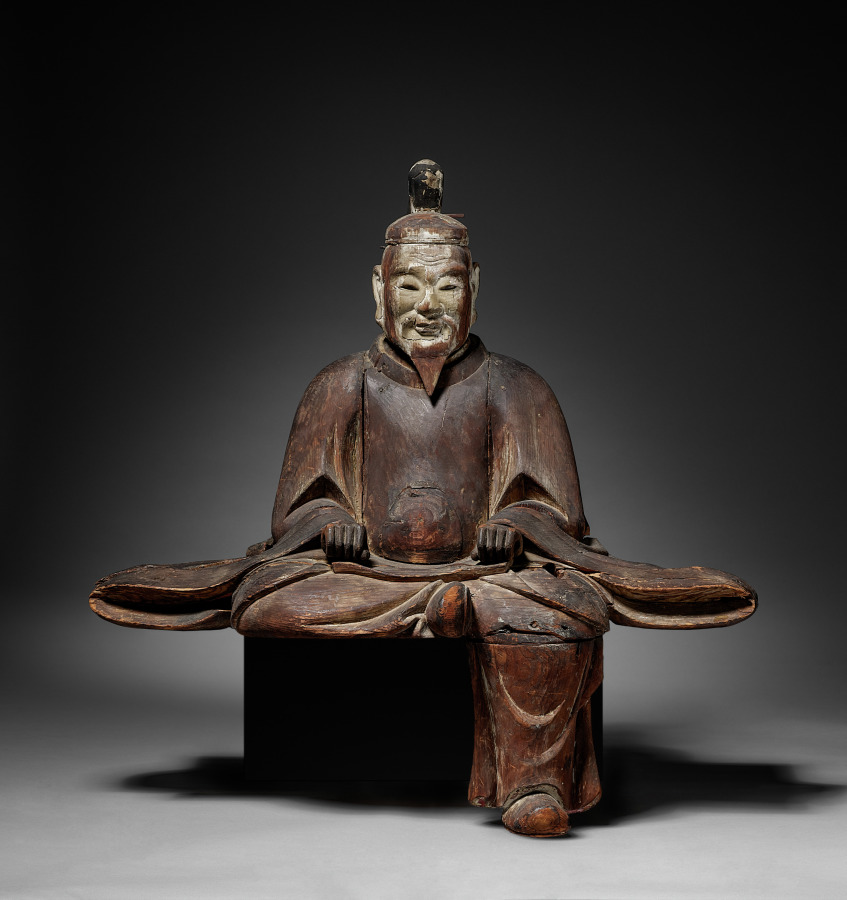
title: One of a Pair of Guardian Figures (Zuishin)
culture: Japan, Muromachi period (1392–1573) to Edo period (1615–1858)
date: c. 1560–1625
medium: Japanese cypress (hinoki) with traces of color; crystal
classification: Sculpture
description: Sculptors carved these two figures to look like members of the guard who protected the Japanese aristocracy in the 10th to 12th centuries. The pair belong in the roofed gate of a Shinto shrine. Their role was to embody the divine protectors of the deities, or kami, residing at the shrine. Their inset crystal eyes make them appear vigilant.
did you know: Some Japanese sculptors used to specialize in inset crystal eyes.